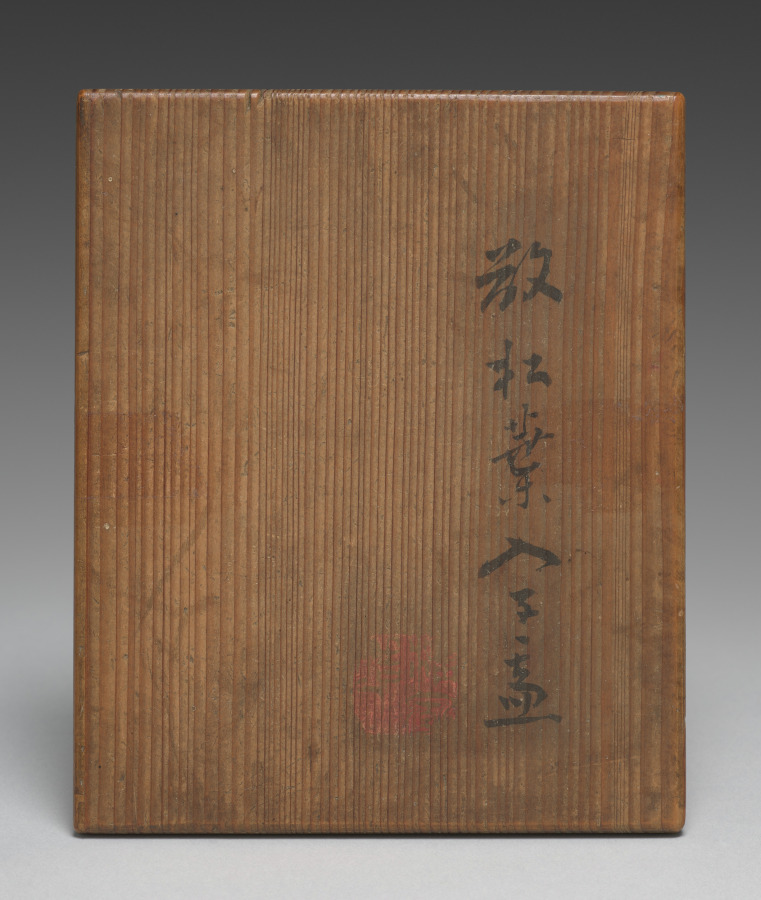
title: Nesting Dishes with Scattered Pine Needles and Maple Leaves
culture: Japan, Edo period (1615–1868)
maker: Seifū Yohei I (Japanese, 1801–1861)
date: 1861–78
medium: Pair of dishes; stoneware with underglaze blue, iron oxide, slip, and crackled glaze, and overglaze color enamel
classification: Ceramic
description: Seifū Yohei I made both blue and white porcelains after Ming dynasty (1368–1644) Chinese wares fired in the kilns at Jingdezhen for export. He also made colorful stoneware in the style of his teacher, Nin’ami Dōhachi (Takahashi Dōhachi II) (1783–1855).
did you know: The combination of the blue and brown for the needles imparts a sense of depth to the design, with the blue needles apparently at a greater distance.